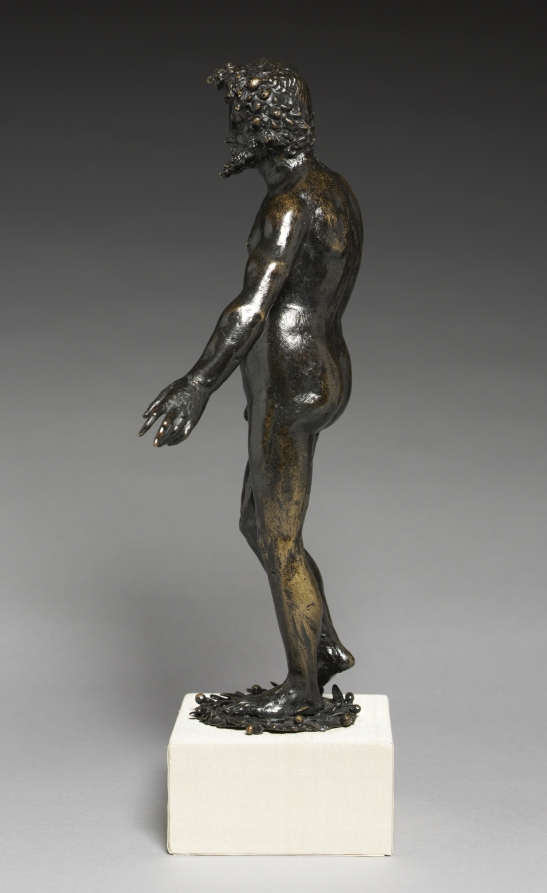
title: Standing Figure of a Man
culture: Italy, Siena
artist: circle of Francesco di Giorgio Martini (Italian, 1439–1501)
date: c. 1500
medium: bronze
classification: Sculpture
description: Derived from classical antiquity, this nude male stands in the contrapposto pose, bearing his weight on his left leg, with his right leg bent, as if in motion. He steps lightly, so that only the toes of his right leg touch the ground. He stands on a laurel wreath, a plant which in antiquity would be waved as a symbol of joy after a military victory. During the Renaissance, small bronzes were kept in cabinets, bringing the gods and goddesses of ancient times into the home. Flaws in the bronze casting suggest that this piece is from the early Renaissance. In 1971, Ulrich Middeldorf rejected Olga Raggio's original attribution to an anonymous Florentine, attributing it instead to the sixteenth-century Sienese artist Francesco di Giorgio Martini (1439-1501), based partly on its resemblance to Francesco's bronze angels in Siena's Duomo. However, such details as the awkward posture and frozen motion of the body relate this work more closely to Francesco's pupil Giacomo Cozzarelli (1453-1515). Standing Figure of a Man is attributed to the circle of Francesco di Giorgio Martini, as uncertainties remain regarding its exact author.